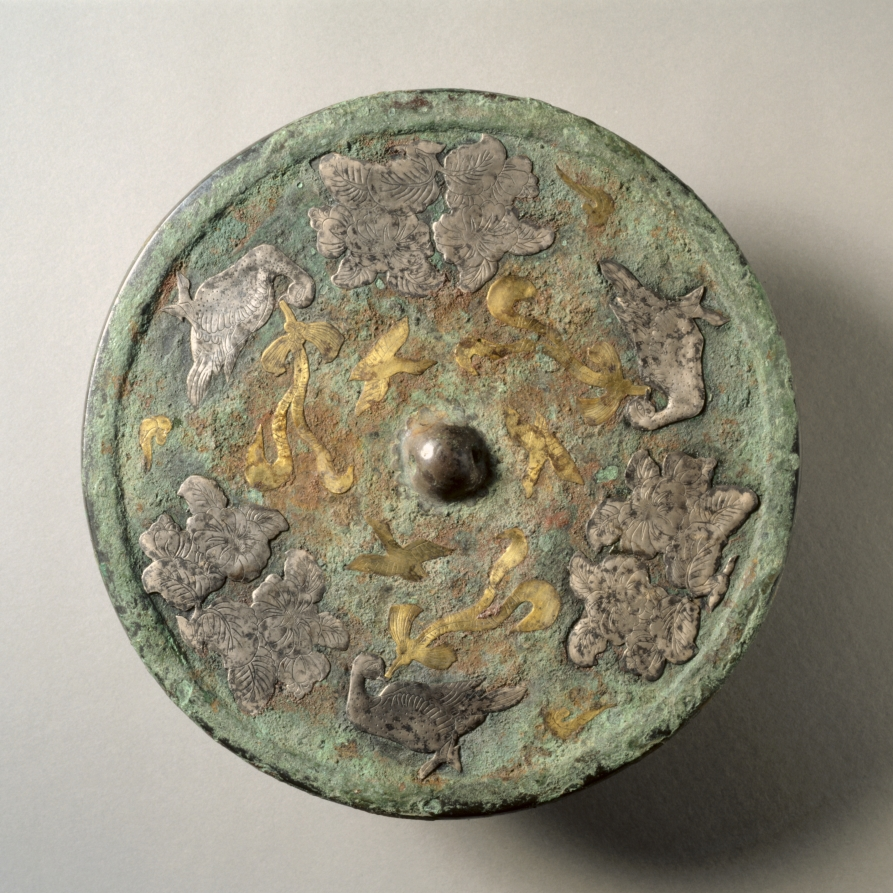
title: Mirror with Flowers and Birds in Gold and Silver Cutouts over a Lacquer Base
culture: China, Tang dynasty (618-907)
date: mid-700s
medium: bronze with gold and silver cutouts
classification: Metalwork